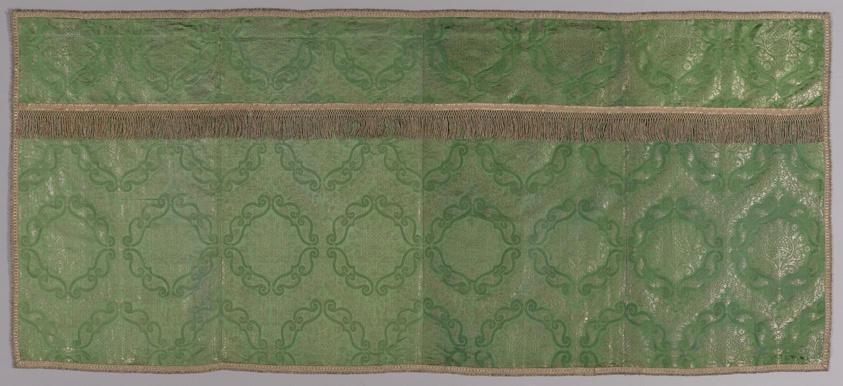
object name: Religious/Ritual Object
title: Altar Frontal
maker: Italy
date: Second half of 16th century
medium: Silk and gilt-metal-strip-wrapped silk, 4:1 satin damask weave with supplementary brocading wefts bound by main warps in weft-float faced 1:4 's' interlacing; edged with gilt-metal-strip-wrapped silk, plain weave with supplementary patterning warps and extended ground weft uncut fringe and silk, gilt-metal-strip and gilt-metal-strip-wrapped silk, stripes of plain weave with supplementary patterning warps and of 2:2 'z' twill weave with extended ground weft, wrapped, knotted uncut fringe; lining: silk, plain weave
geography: Italy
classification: textile; weaving; ritual objects; liturgical